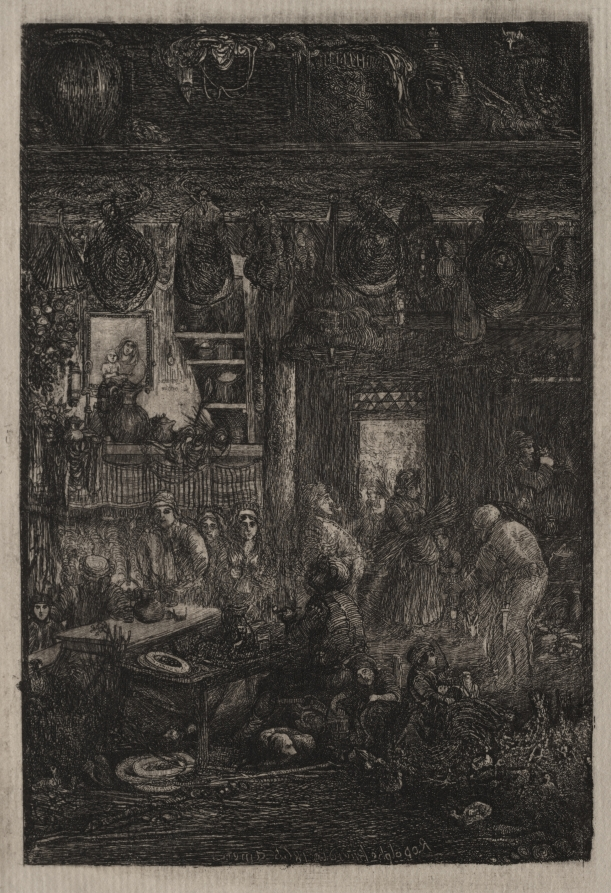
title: Moldavian Interior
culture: France, 19th century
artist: Rodolphe Bresdin (French, 1822–1885)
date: 1865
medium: etching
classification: Print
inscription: lower left, in plate: Rodolphe Bresdin 1865 amen. (in reverse)